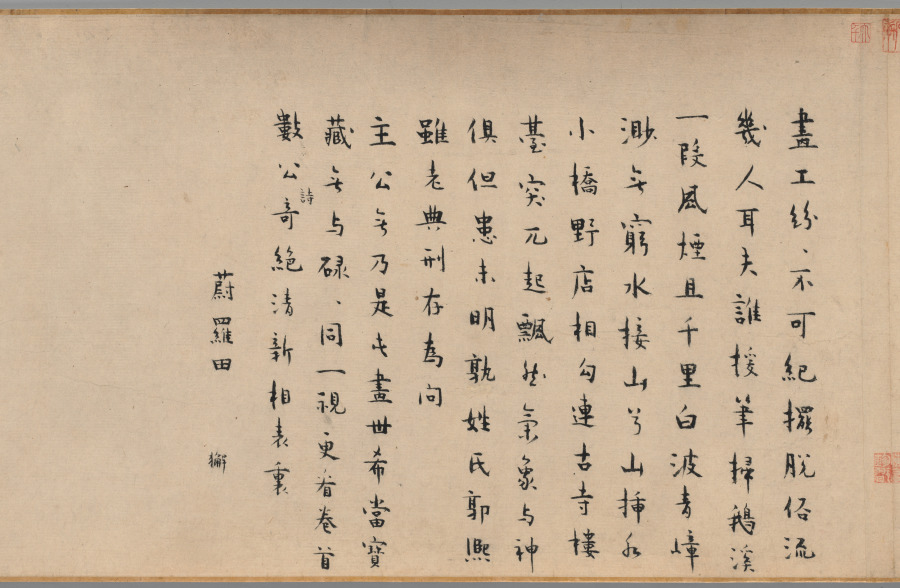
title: Streams and Mountains without End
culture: China, late Northern Song dynasty (960-1127) - Jin dynasty (1115-1234)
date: 1100–1150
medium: handscroll; ink and slight color on silk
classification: Painting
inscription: 9 colophons and 48 seals: 1 colophon, dated 1205, of Wang Wenwei 王文蔚 (dates unknown); 1 colophon, dated 1205, of Li Hui 李惠 (dates unknown); 1 colophon of Weiluo Tian Xie 蔚羅田獬 (dates unknown); 1 colophon, dated 1214, of He Yan 何言 (dates unknown); 1 colophon, dated 1326, of Cao Yuanyong 曹元用 (d. 1329) 1 colophon, dated 1332, of Kangli Zishan 康里子山 (Naonao; 1295-1345); 1 colophon, dated 1336, of Liu Zai 劉載. (dates unknown); 1 colophon, dated 1380, and 4 seals of Yang Mao 楊懋 (1300-after 1380); 4 seals of the Hou family (ca. 1340); 1 colophon of Wang Duo 王鐸 (1592-1652); 4 seals of Zhang Bingqian 張秉乾 (juren of 1729); 8 seals of Liang Qingbiao 梁清標 (1620-1691); 2 seals of the Qianlong emperor (r. 1736-95); 4 seals of the Jiaqing emperor (r. 1796-1820); 3 seals of the Xuantong emperor (r. 1909-11); 2 seals of Ye Gongchuo 葉恭綽 (1881-1968); 17 seals of Zhang Yuan 張爰 (Zhang Daqian 張大千, 1899-1983).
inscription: Colophon 1. Wang Wenwei 王文蔚. Dated third month and third day, 1205, under the reign of Zhangzong of the Jin dynasty. 造物元無心，山川秀氣聚。畫手亦無盡，各出新意度。 誰將妙林泉，淡墨寫縑素。重巒疊嶂間，三兩人家住。 茅舍隔素籬，小橋通細路。溪上數葉舟，雅有物外趣。 嵓崦藏招提，依稀認窗戶。山色四時宜，雲煙自朝暮。 不知塵世中，此景在何處。收拾買山錢，投老好歸去。 泰和乙丑三月三日平原王文蔚謹再拜，書于河東縣署之野趣堂。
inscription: Colophon 2. Li Hui 李惠. The colophon was written three days before the Qingming Festival in 1205. 畫師慣在山中居，含毫吮墨聊自娛。 閑將一段冰霜絹，寫出千里江山圖。 前山後山互出沒，山腰林樾相縈紆。 危橋澗溜瀉鳴玉，山根一匯為平湖。 波平短艇快漁釣，雲深細徑來樵蘇。 僊宮梵宇占幽勝，雕欄複閣森蓬壺。 往來行客煙靄外，飄飄野店青帘孤。 人家雞犬聲相接，熙熙化日安唐宇。 嗟余嗜好何其迂，膏肓泉石真吾徒。 一行作吏墮世網，薄書汨沒勞奔趨。 千巖萬壑但夢想，故園三徑應將蕪。 披圖暫洗黃塵眼，拊膺三嘆空踟躕。 泰和乙丑清明前三日絳臺李惠書于舜城府署之九思堂。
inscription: Colophon 3. Weiluo Tian Xie 蔚羅田獬. 畫工紛紛不可紀，擺脫俗流幾人耳。 夫誰援筆掃鵝溪，一段風煙且千里。 白波青嶂渺無窮，水接山兮山插水。 小橋野店相勾連，古寺樓臺突兀起。 飄然氣象與神俱，但患未明孰姓氏。 郭熙雖老典型存，為問主公無乃是。 此畫世希當寶藏，無與碌碌同一視。 更看卷首數公詩，奇絕清新相表裏。 蔚羅田獬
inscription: Colophon 4. He Yan 何言. Written in 1214. 萬有來自無，一真歸所託。畫師得三昧，胸中幻丘壑。 百態逐墨破，群形隨筆落。地近迹分明，天遙痕隱約。 雲物自吐吞，峯巒非斧鑿。江鄉閴無市，谷關常不鑰。 中有野夫閑，童琴而歩鶴。酒斾出籬懸，漁舟臨岸泊。 澗樹蔽橋樑，巖松迷殿閣。岑疊宿霧重，野曠林煙薄。 危棧接縈紆，亂泉通脈絡。途中人往來，僕馬何羸弱。 怪石虎踡跼，古木龍蟠錯。一幅宜好收，千金非易博。 玉堂閑卷舒，眼界增寥廓。視險尚寛平，見危除慘虐。 氣象溢國華，川澤資廟略。功名業已書，歸去鞭先著。 但知色即空，何是今非昨。飽乎仁智心，箇中無限樂。 貞祐甲戌秋暮，東營何言題。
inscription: Colophon 5. Cao Yuanyong 曹元用 (d. 1329). Dated 1326. 岸擁危橋斷，溪浮小艇斜。 萬山最深處，依約兩三家。 泰定丙寅秋，曹元用題。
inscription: Colophon 6. Kangli Zishan 康里子山 (i.e., Kangli Naonao). The colophon bears a date of 1332. 右溪山圖，意韻蕭灑。一見使人有烟霞之想，真可珍藏。又有□金諸名勝題詩其左。兵火之餘， 殊不易得也。 至順三年暮春之月，康里子山跋。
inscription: Colophon 7. Liu Zai 劉載. 雲拂埜田閑種玉，雨餘巖溜碎傾金。 幾時也結團茆去，麟閤恬然不挂心。 至元二年正月，長安劉載載之謹錄上。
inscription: Colophon 8. Yang Mao 楊懋 (1300–after 1380). 觀此圖，經營位置，筆法高古，山明石潤。其橋梁、路道、樹林、人物、遠近；一一誠得真山水之深趣。非當時名筆有大才者不能至此。不必問其誰何，可為神品。况宋金元三朝名公所跋，尚不能記，想其來尤遠矣。然而物經累變而尚存，是物之有壽者也。余不復再論。文顯其保之。洪武庚申春，八十翁楊懋觀。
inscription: Colophon 9. Wang Duo 王鐸 (1592–1652). 文蓀親翁博雅，文詩鴻暢。舍弟持此喜觀，遂抽管題數語： 山勢委折，筆墨無痕。宋人中如此不多見也。譬之兵家，當是韓白。王鐸。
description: Streams and Mountains without End was a landmark acquisition of 1953, made just a year after Sherman Lee had returned to Cleveland as curator of Oriental art. He acquired it with the intention to provide "a more than adequate foundation for a fine collection of Chinese landscape painting." This impressive work demonstrates the culmination of stylistic developments in Chinese monumental landscape painting following the Northern Song tradition. It represents a journey through a landscape, making it a fitting metaphor for Lee’s journey of discovery and achievement over a lifetime.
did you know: The portrayal of the distant lands is rich with details like pavilions, villages, and human activities.